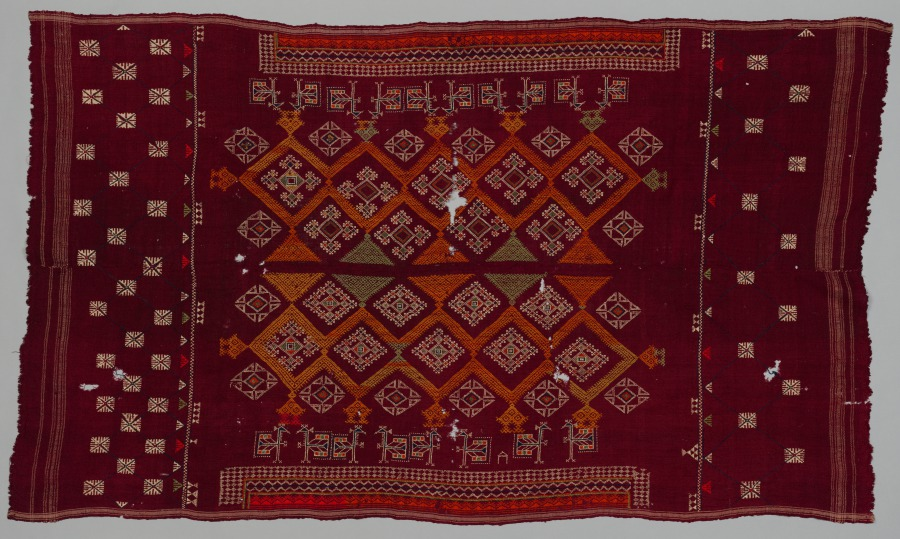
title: Shawl (?)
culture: India, 18th-19th century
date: 1700s - 1800s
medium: embroidery on wool ground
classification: Embroidery